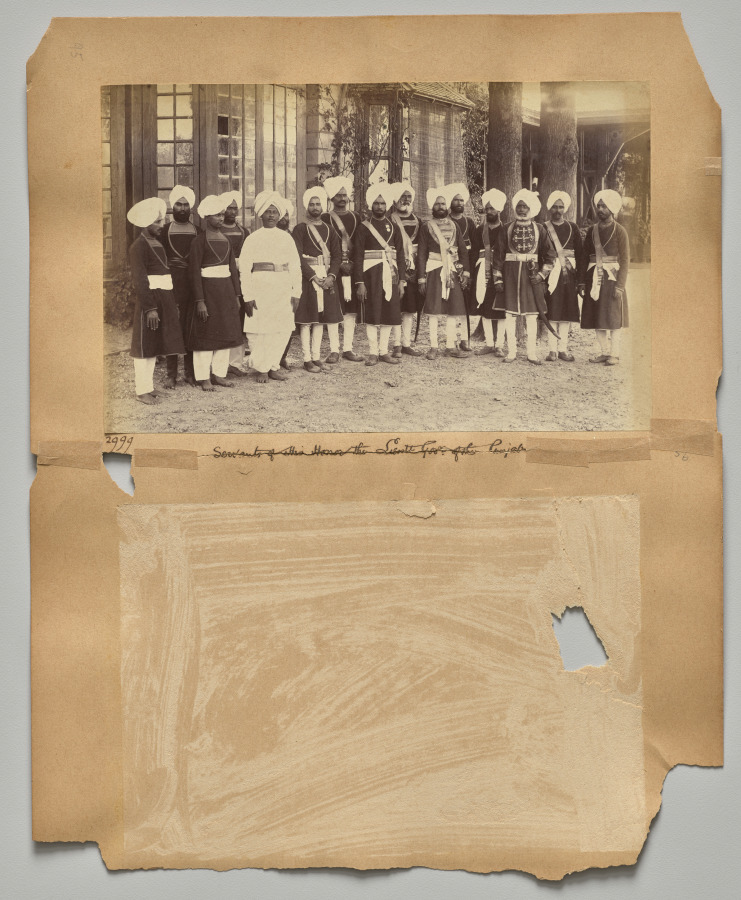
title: Servants of His Honor the Gov. of Punjab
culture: India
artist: Raja Deen Dayal (Indian, 1844–1905)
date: c. 1882–87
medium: albumen print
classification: Photograph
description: These photographs are part of an album, now disassembled, of around 105 photographs taken in India between 1885 and summer 1887 that provide glimpses into the lives of the British colonial elite and royal and upper-class Indians. The museum holds another group of 37 pictures from this album (2016.266), which was probably commissioned by a British civil servant visiting or working in India around 1888 as a personal souvenir of his experiences there.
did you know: Raja Deen Dayal is regarded now, and was considered during his lifetime, to be India’s most important 19th-century photographer.